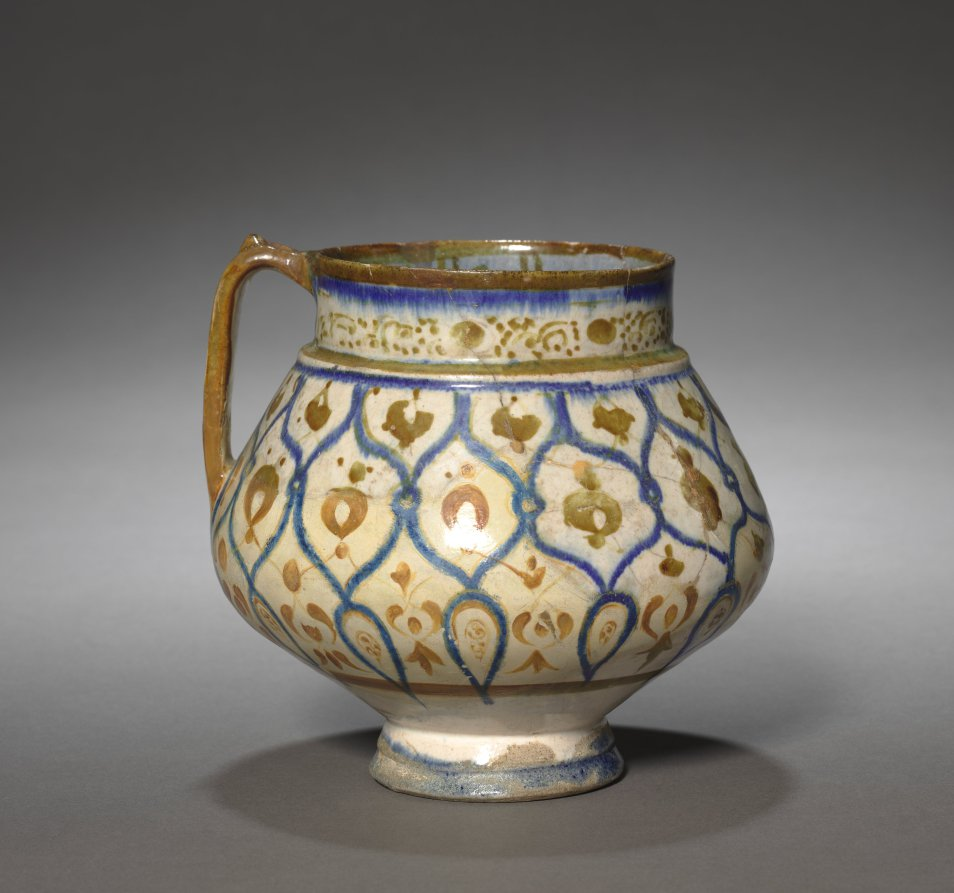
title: Jug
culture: Iran, Kashan, Seljuq period of Iran (1037–1194)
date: 1170–1220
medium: fritware with luster-painted design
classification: Ceramic